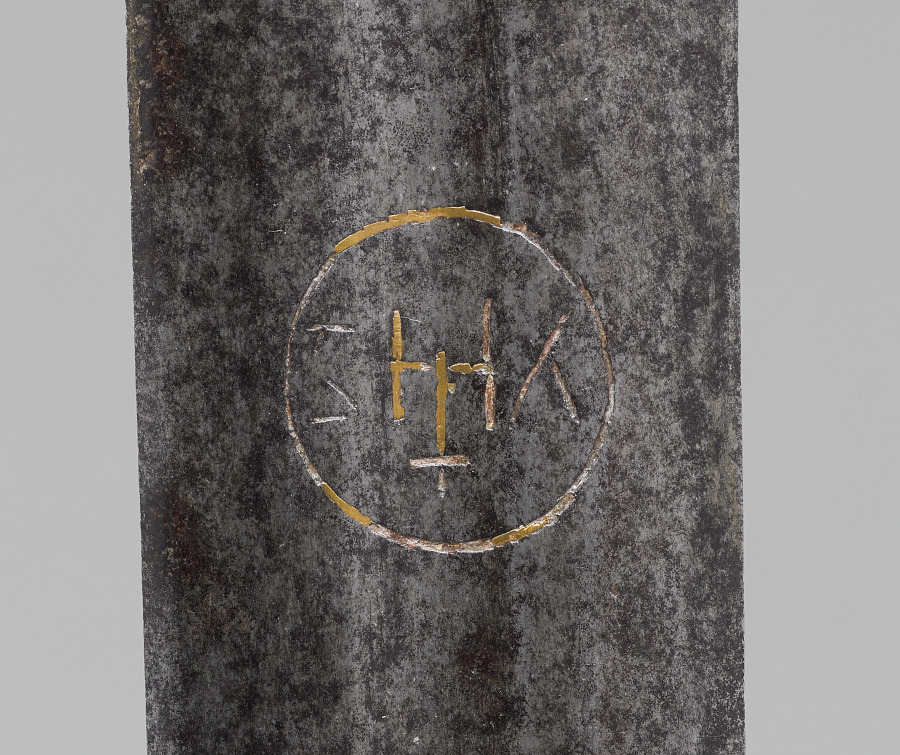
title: Sword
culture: Germany (?)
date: 1400s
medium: steel; wood and leather grip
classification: Arms and Armor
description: During medieval times, everyday objects carried deep spiritual meanings. The knight's sword was perceived as the noblest of weapons because its shape symbolized the cross on which Christ died.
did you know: The unornamented surfaces and signs of use on this sword and those similar to it lead us to believe that they were used in battle. Despite their utilitarian purpose, the blacksmith added details to the handles and hilts to make them visually appealing.